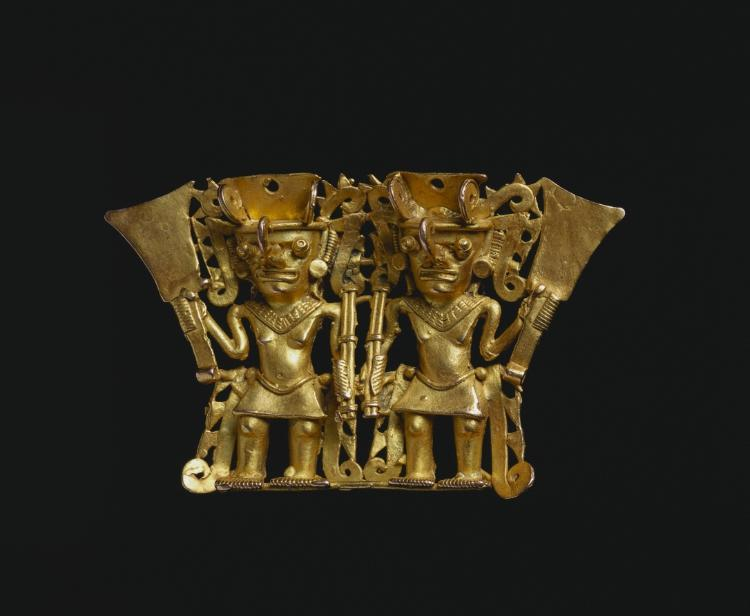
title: Bat-Nosed Figures Pendant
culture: Panama, Azuero Peninsula, Parita style, 11th-16th century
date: 1000–1550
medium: cast gold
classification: Metalwork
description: Both pendants depict paired figures with tusklike noses. The "tusks" perhaps refer to the upswept nose of the leaf-nosed bat, an agile hunter whose "leaf" helps it to snatch prey from midair. The bat's success as a hunter is part of the reason that some identify such paired figures as warriors. They each hold a paddle-shaped object; the larger pair, in elaborate costumes, also clutches staffs.